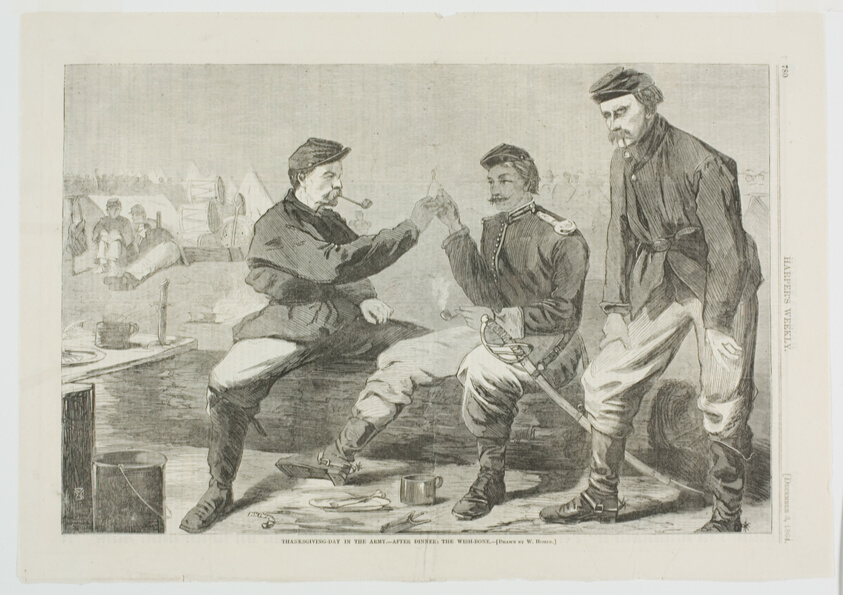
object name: Print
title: Thanksgiving Day in the Army—After Dinner: The Wish Bone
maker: Winslow Homer (American, 1836-1910); published by Harper's Weekly (American, 1857-1916)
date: published December 3, 1864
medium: Wood engraving on paper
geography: United States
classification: wood engraving; print; prints and drawing